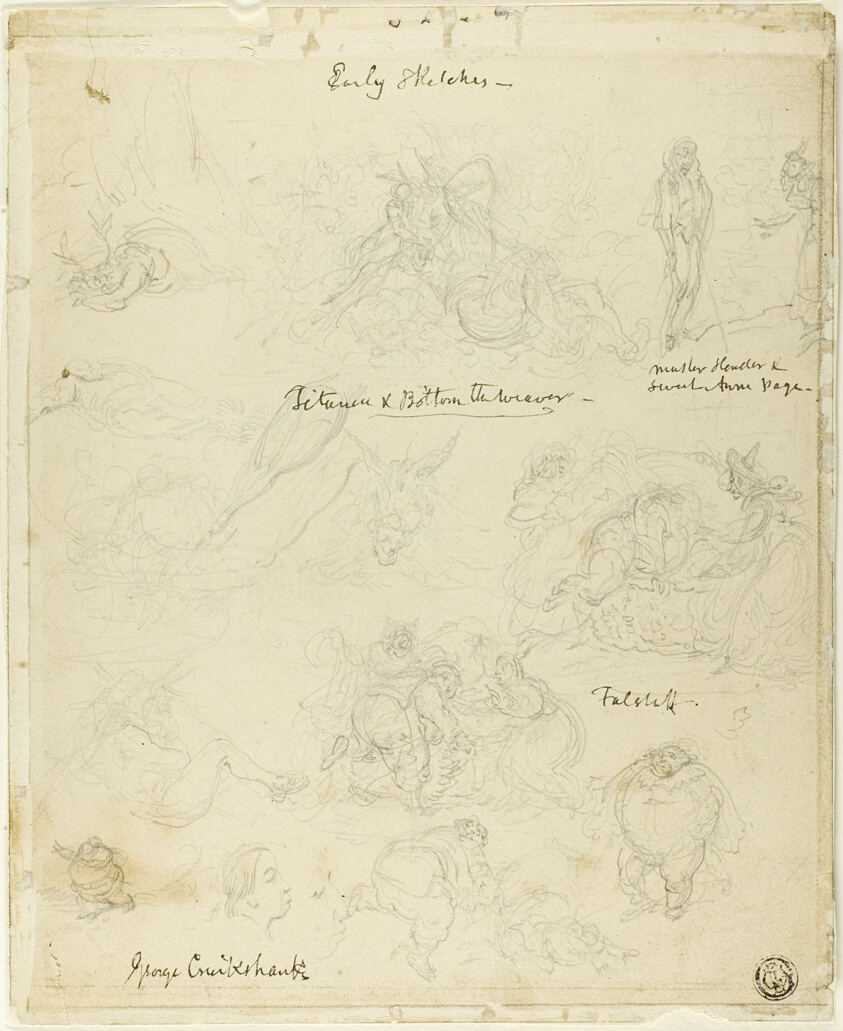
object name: Drawing and Watercolor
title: Early Sketches for Falstaff, Midsummer Night's Dream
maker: George Cruikshank (English, 1792-1878)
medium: Graphite on buff wove paper, laid down on buff wove card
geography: England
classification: graphite; drawings (visual works); prints and drawing